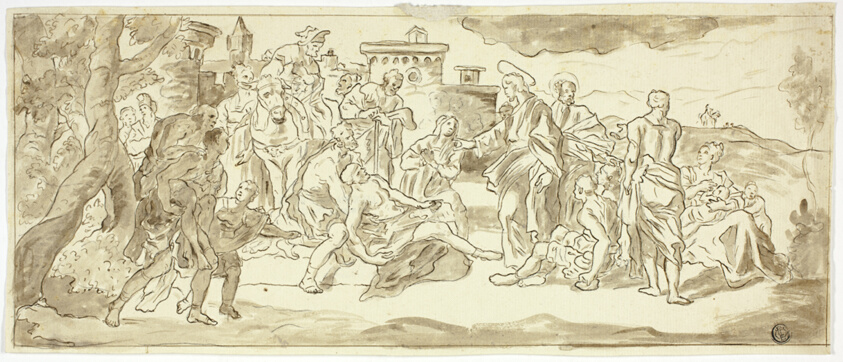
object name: Drawing and Watercolor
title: Christ Healing the Lame Man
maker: After Francesco Solimena; Italian, 1657-1747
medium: Pen and brown ink, with brush and brown wash, over black chalk, on ivory laid paper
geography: Italy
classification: pen and ink drawings; drawings (visual works); prints and drawing